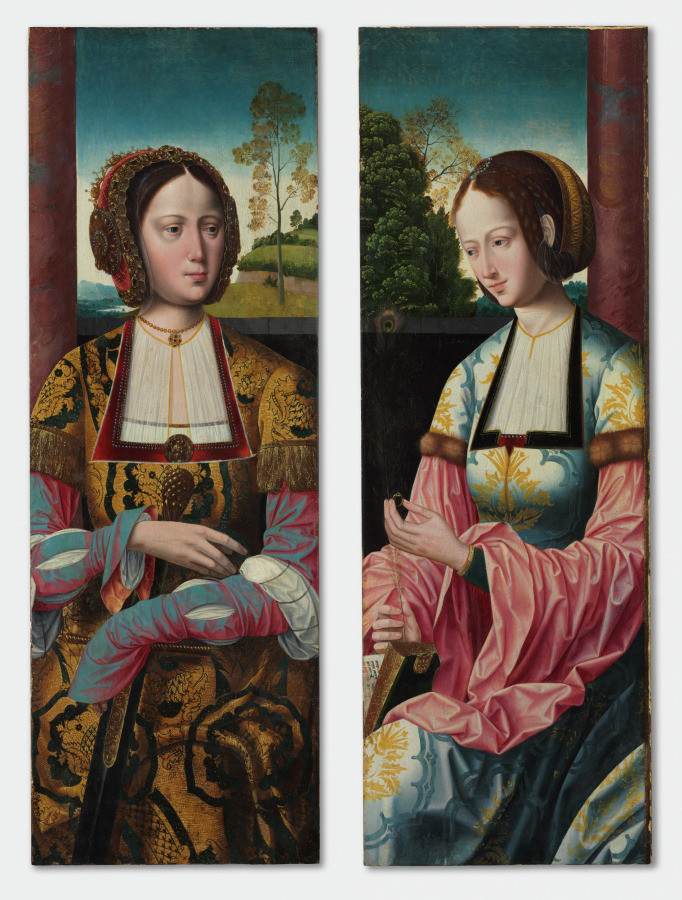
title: Saint Catherine and Saint Barbara (pair)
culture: Flanders, Bruges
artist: Master of the Holy Blood (Netherlandish)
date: c. 1520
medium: tempera on wood panel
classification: Painting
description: Saint Catherine holds the sword with which she was martyred, and Saint Barbara holds both a book and a ring symbolizing her scholarly pursuits and union with God. According to legend, the leather thongs with which she was beaten were transformed into peacock plumes. These two paintings were originally the wings of an altarpiece flanking a central panel, now lost, that may have depicted the Holy Family. The identity of this artist is unknown, but he is named for a painting in the Chapel of the Holy Blood in Bruges. Bruges flourished as an international commercial center through the 1400s and early 1500s. Among its residents were many foreign merchants and bankers who, along with the Burgundian court, patronized artists and attracted specialized craftsmen such as furriers, hatters, jewelers, and goldsmiths. Bruges’s artistic production in the 1400s included celebrated artists like Jan van Eyck, Petrus Christus, Hans Memling, and Gerard David who painted large altarpieces, small panels for private devotion, and portraits. Bruges also remained an important center for the production of illuminated manuscripts.